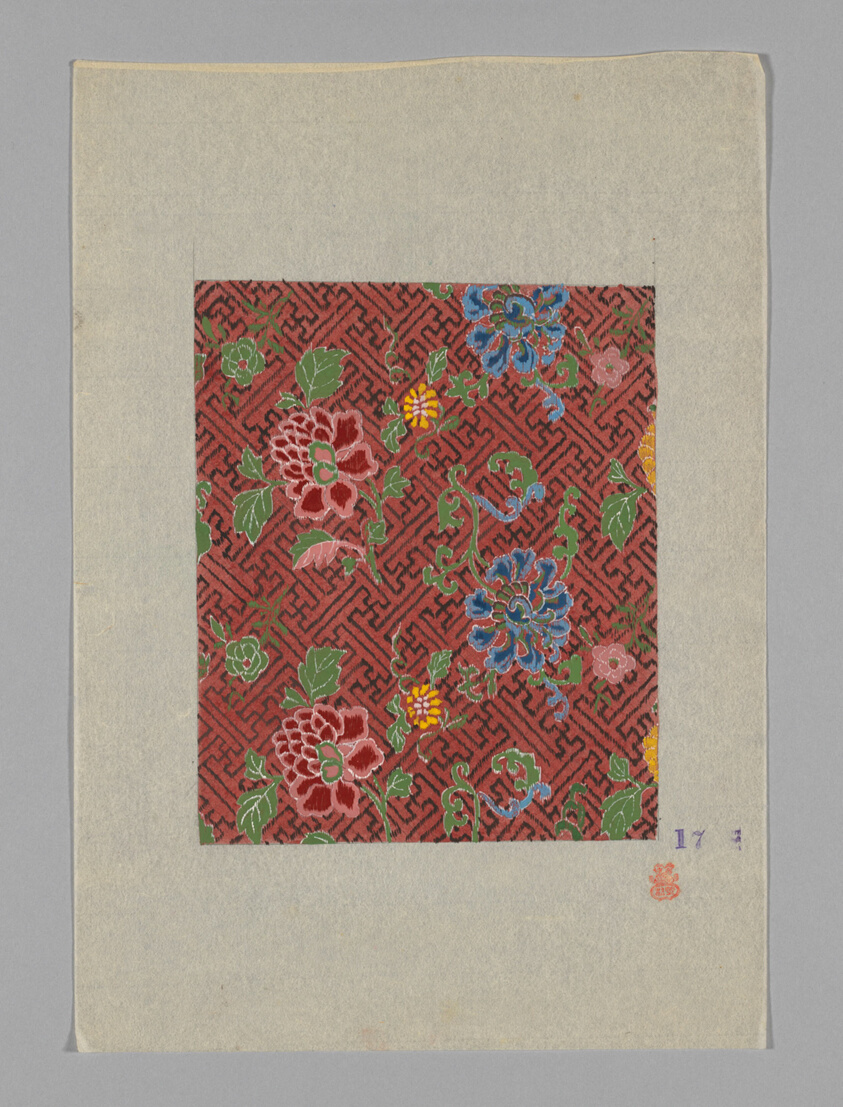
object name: Drawing and Watercolor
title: Design on Paper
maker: Japan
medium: Paper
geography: Japan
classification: textile; accessory - paper design; watercolor; paper